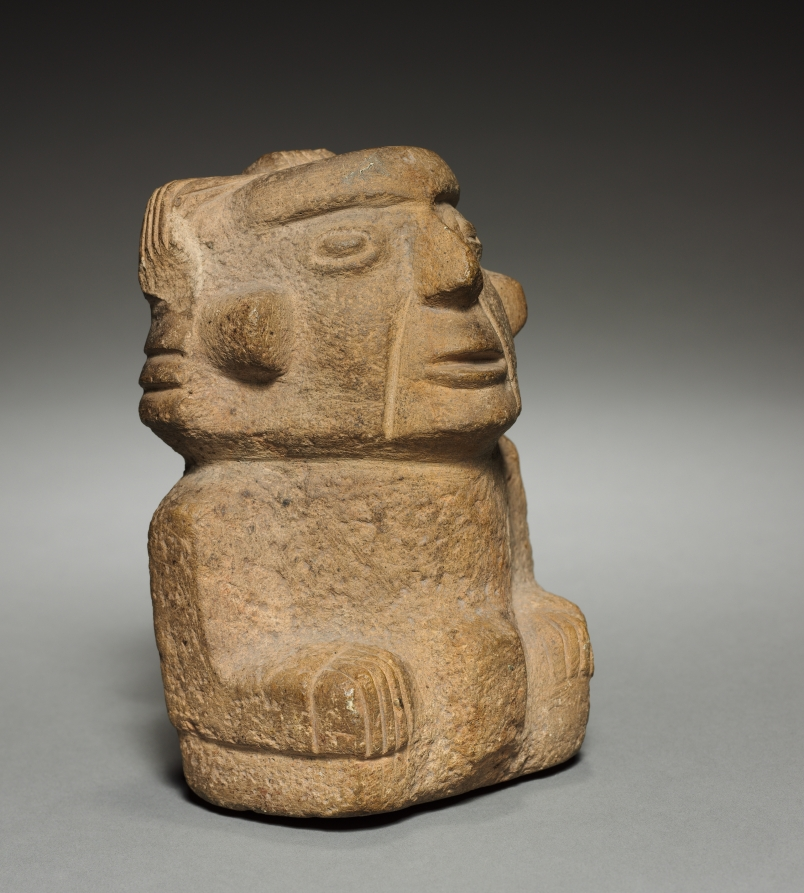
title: Seated Figure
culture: Pre-Columbian style, 20th century (?)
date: 20th Century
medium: tan stone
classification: Sculpture